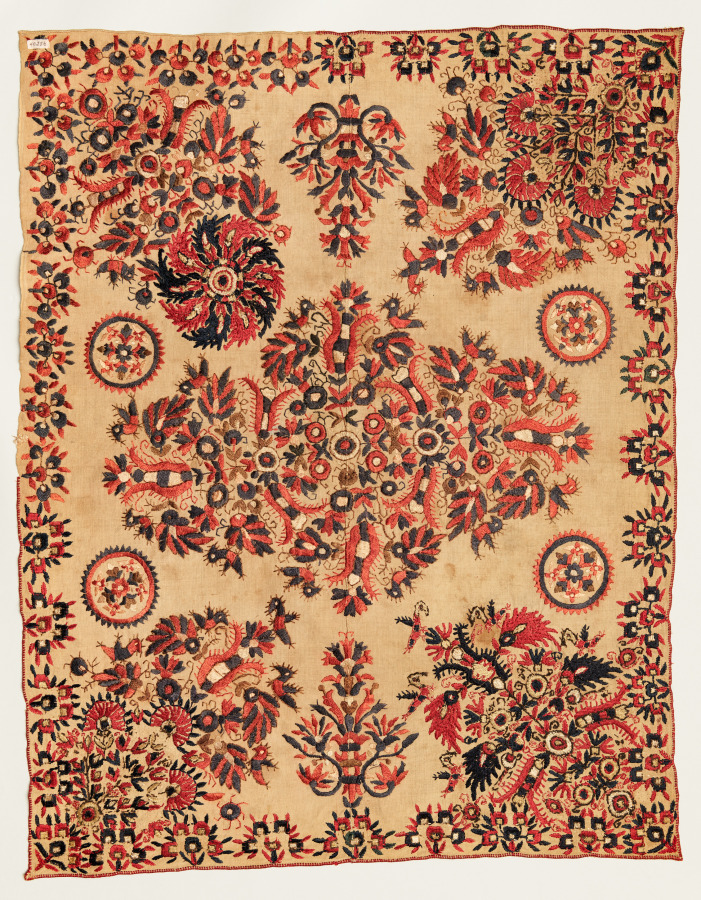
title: Fragment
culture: Africa, North Africa, Algeria, Algerian embroiderer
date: 1800s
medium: Linen, silk, dye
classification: Embroidery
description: This woven linen textile is decorated with silk-thread embroidery in several colours. The initial composition layout consists of dark red and navy blue florals along three sides of of the textile, with a "pinwheel" in the fourth. A second layer of embroideries seems to have been added, filling all of the empty spaces with additional florals and small medallions in an orange and slate blue colour palette.